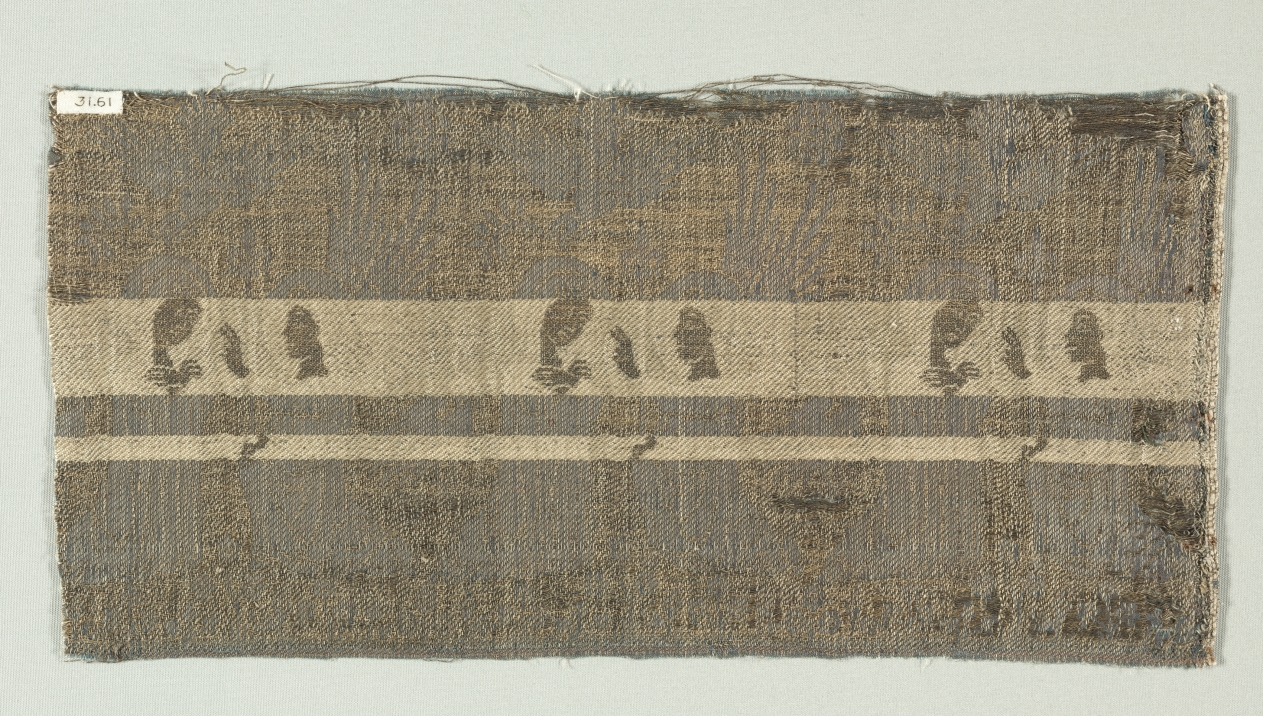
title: Textile Fragment with the Annunciation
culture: Italy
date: 1370–1400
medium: Silk with gold thread; lampas weave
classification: Textile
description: The motif shown here depicts the Virgin Mary and the angel Gabriel in a repeating sequence. Both figures kneel above a bed of flowers while a dove representing the Holy Ghost hovers above. The ground of this luxury silk, woven with highlights of gold thread, is now a faded blue. Its original purpose is not clear, but it may have originally been part of an altar frontal or possibly an ecclesiastical cope, or cape.